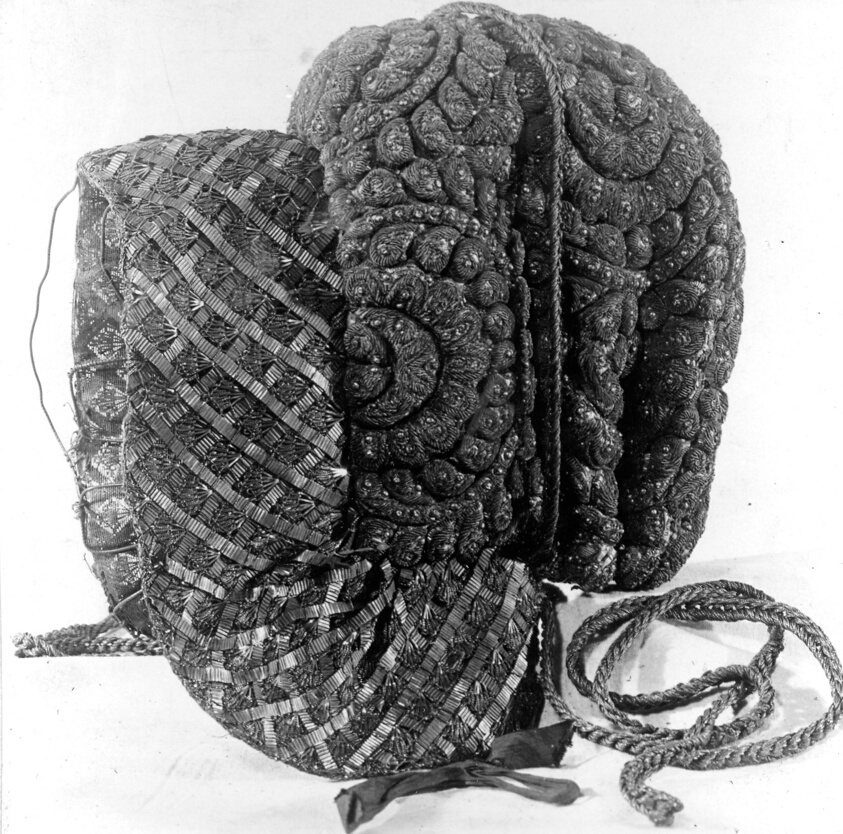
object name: Costume and Accessories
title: Headdress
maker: Austria, Vienna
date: 19th century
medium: Heavy gold embroidered with wired gold lace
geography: Austria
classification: textile; headdress - needlework; costume accessory - headdress; costume accessory; costume; dress (garment); clothing